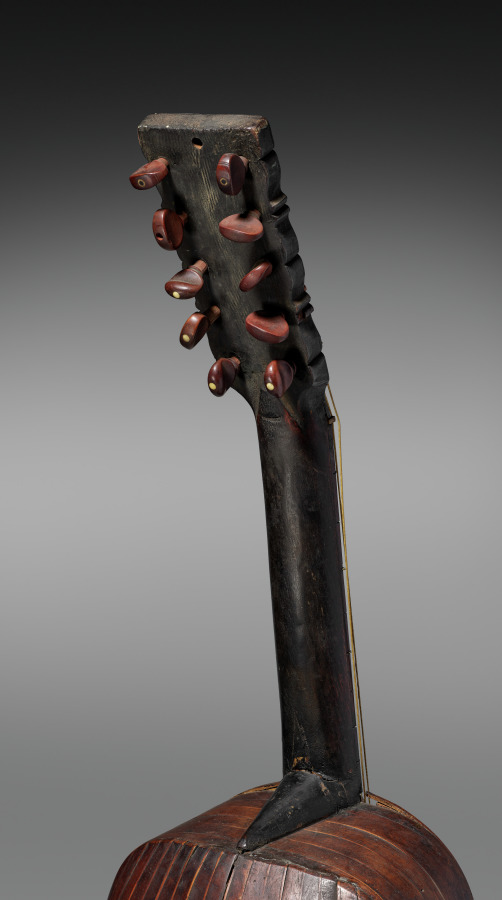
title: Chittara Battente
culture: Italy, 15th century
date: 1400s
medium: wood, paper?, sound hole, bone bridge, sheet metal inlay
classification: Musical Instrument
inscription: bears broken ticket of parchment.